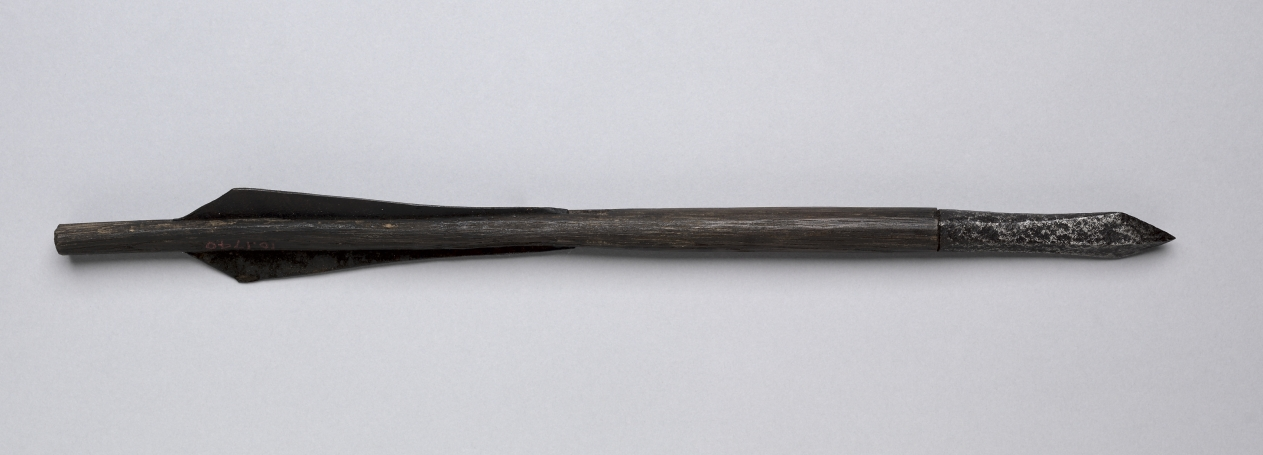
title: Crossbow Bolt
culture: Germany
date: 1500s–1600s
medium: wood, leather, steel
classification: Arms and Armor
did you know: Bolts with feathering made of leather were used mainly in the Tyrolean area, which includes northern Italy and western Austria.